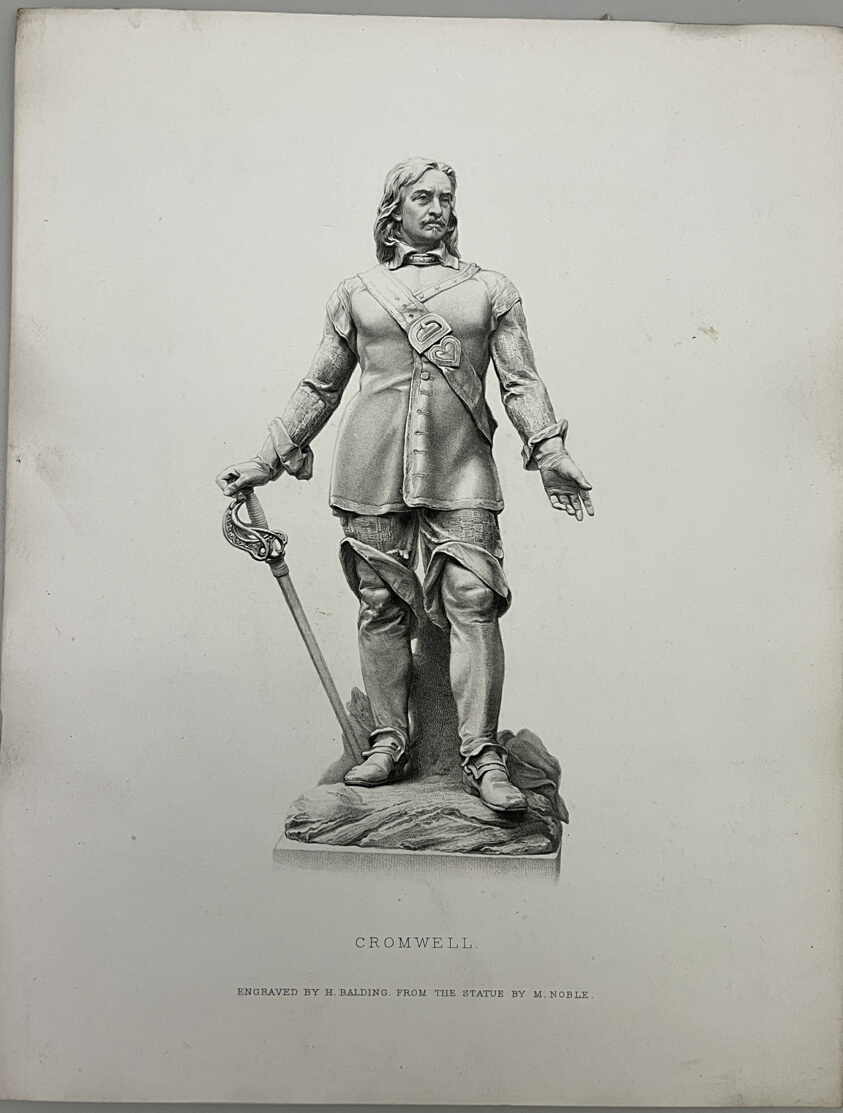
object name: Print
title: Cromwell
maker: H.C. Balding (British, active 1869-1876); after Matthew Noble (British, 1817-1876); likely published by Virture & Co. (British, 1820s-1908)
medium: Steel engraving on paper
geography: England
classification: reproduction; print; prints and drawing